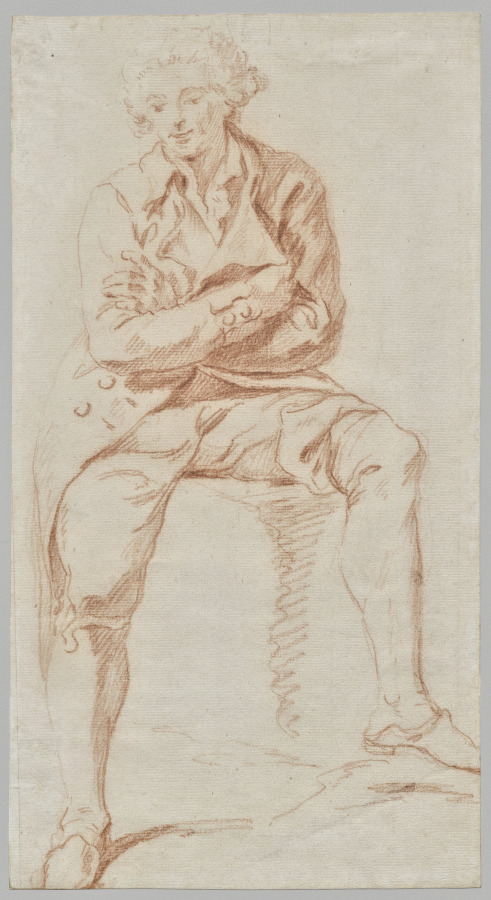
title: A Man Seated on the Edge of a Table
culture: France, 18th century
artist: Charles Parrocel (French, 1688–1752)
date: 18th century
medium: Red chalk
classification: Drawing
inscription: verso, lower center, in graphite: C. Parrocel fec.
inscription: verso, center, in graphite: 54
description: Known for his red chalk studies of cavalry men, this work is characteristic of Parrocel’s drawn oeuvre. Casually seated at the edge of a table with his arms crossed, the man gently smirks at something he sees. His costume suggests that he is a soldier, who has discarded his hat and weapon while he rests from his arduous labor.